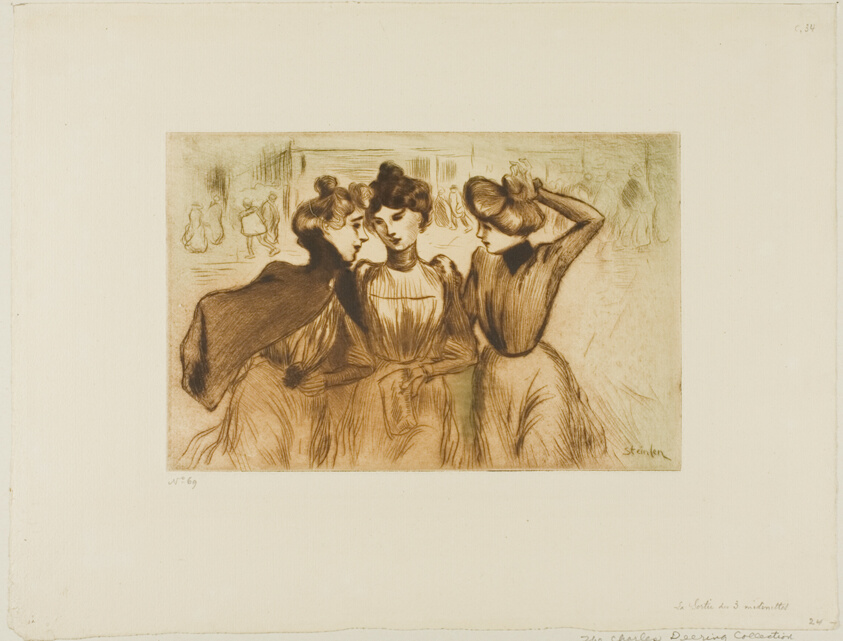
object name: Print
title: Three Working Girls Out for Lunch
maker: Théophile-Alexandre Steinlen; French, born Switzerland, 1859-1923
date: 1900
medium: Drypoint printed à la poupée in brown and green ink on ivory laid paper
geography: France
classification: drypoint; print; prints and drawing